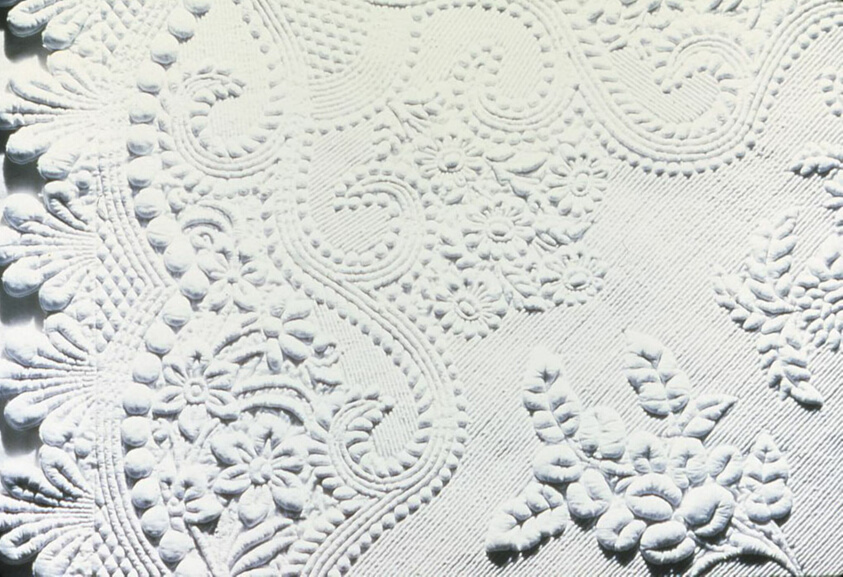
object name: Textile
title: Bedcover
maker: France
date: 1825/75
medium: Cotton, plain weave; quilted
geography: France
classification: textile; needlework - quilt